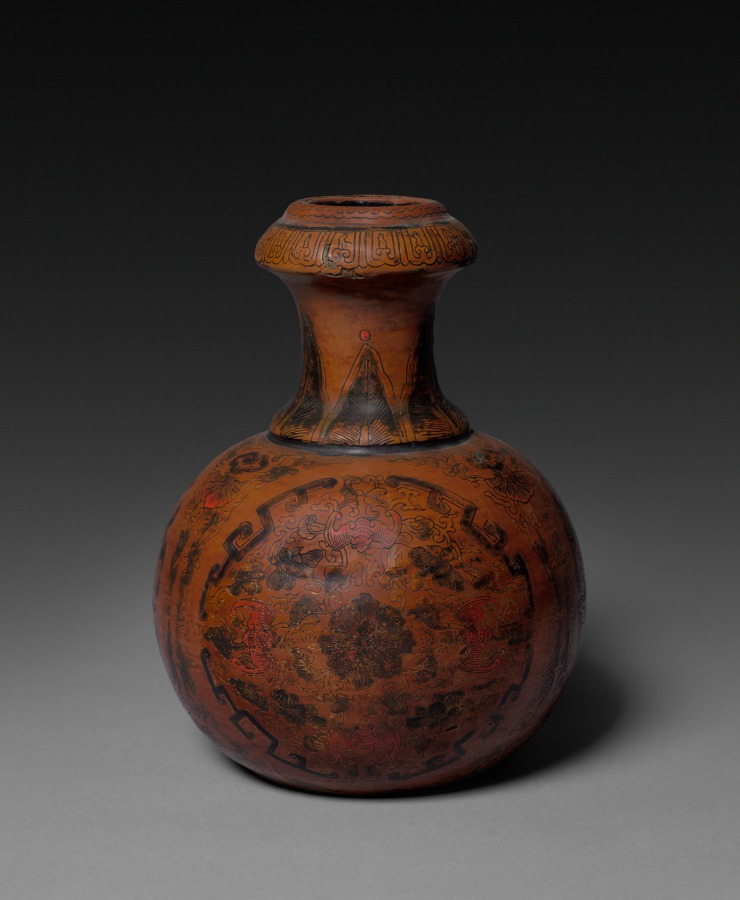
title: Vase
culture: China, Qing dynasty (1644-1911)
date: 1644–1911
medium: lacquered wood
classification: Lacquer